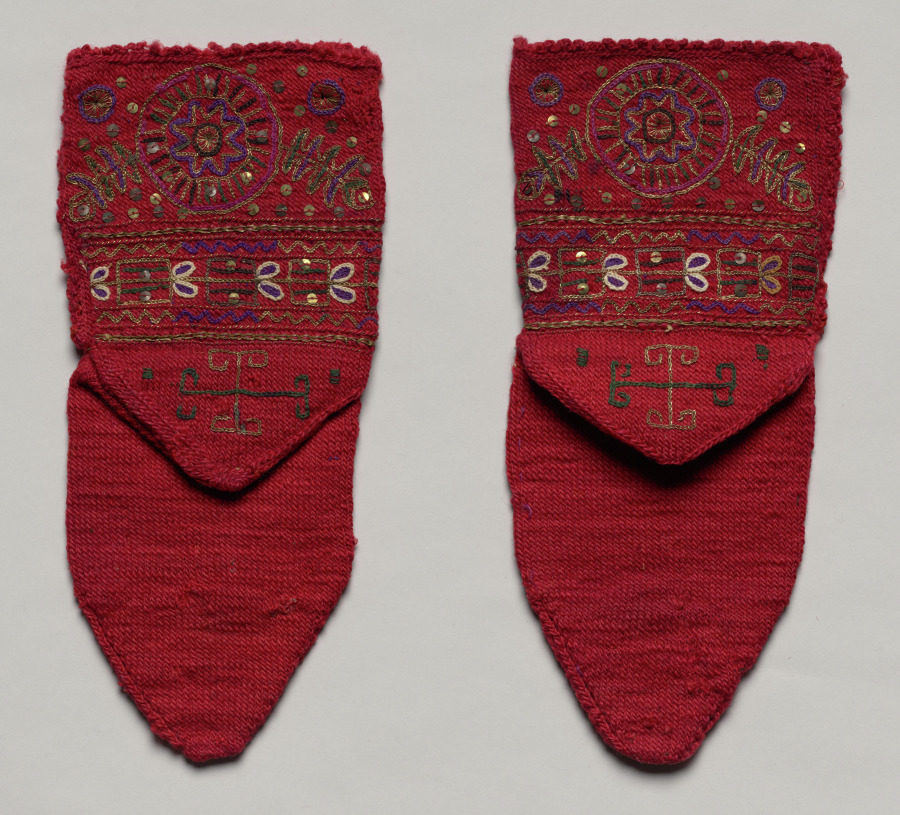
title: Woman's Bridal Socks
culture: Yugoslavia, Serbia, 20th century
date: early 1900s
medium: embroidered wool, gold thread, sequins, knitting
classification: Knitting